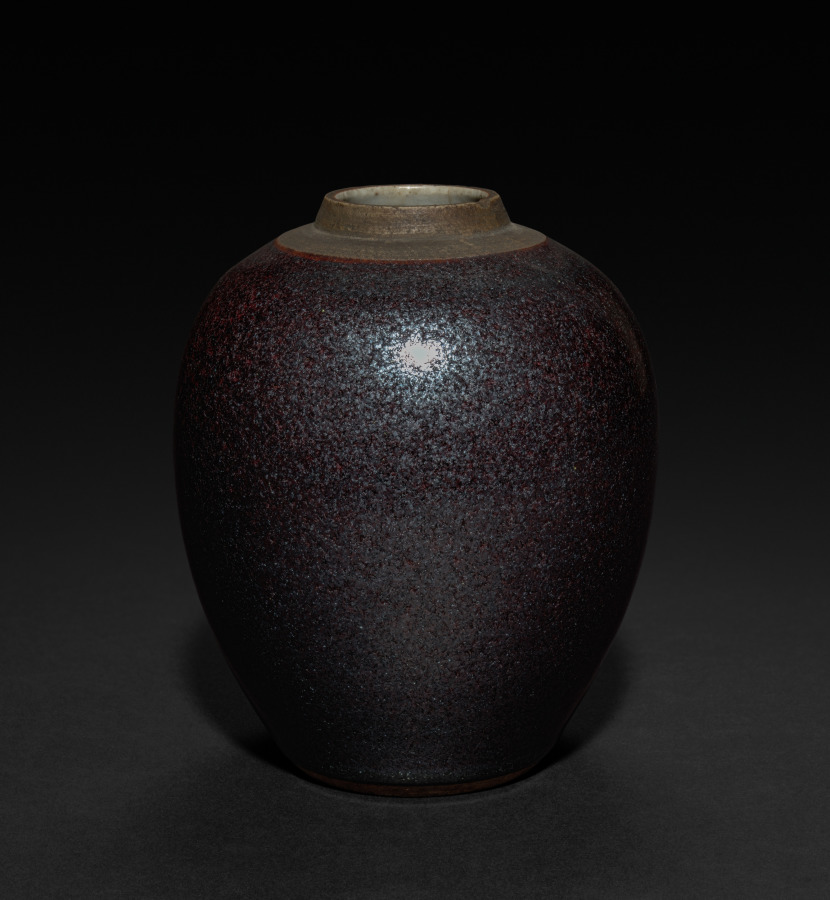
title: Jar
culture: China, Qing dynasty (1644–1911), Qianlong reign (1736–95)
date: 1736–95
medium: porcelain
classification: Ceramic